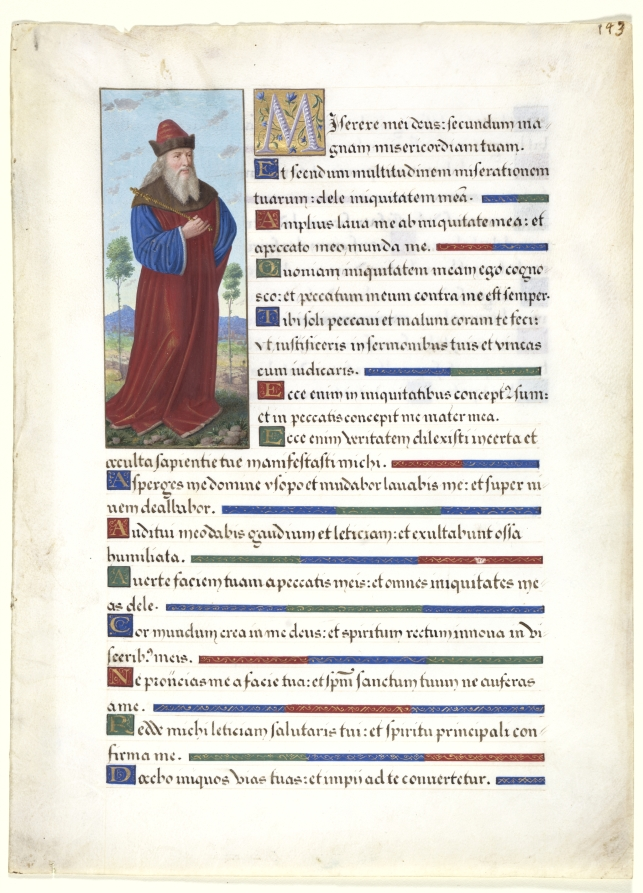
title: Leaf from a Book of Hours: King David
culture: France, 15th century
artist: circle of Jean Bourdichon (French, c. 1457–1521)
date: c. 1500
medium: ink, tempera, and gold on parchment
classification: Manuscript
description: The illuminator Jean Bourdichon was court painter to four successive kings of France: Louis XI, Charles VIII, Louis XII, and Francis I. On the basis of surviving documents, he seems to have been principally active between 1478 and 1520. The text is that of Psalm 50 beginning Miserere mei deus (Have mercy on me, O God), and one of the Seven Penitential Psalms found in medieval books of hours. It is the life of David, who according to tradition, was the author of the psalms, that dominates the miniatures for the Penitential Psalms. As a proud and powerful king who flagrantly committed both adultery and murder, David was struck down and reprimanded by God. The Penitential Psalms themselves, especially Psalm 50, are associated with his penance for these sins.